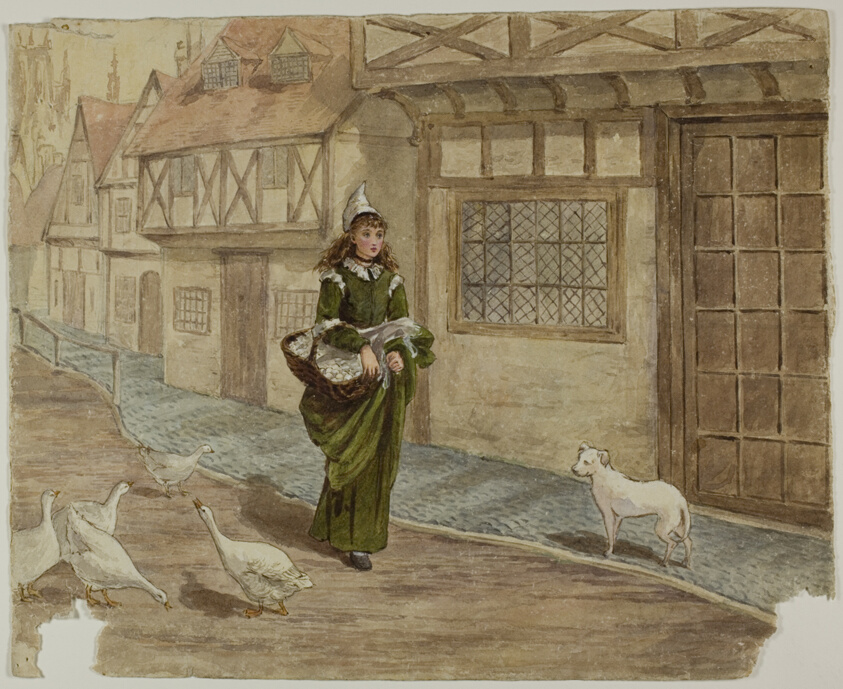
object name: Drawing and Watercolor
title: Girl with Eggs and Geese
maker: Kate Greenaway (English, 1846-1901)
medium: Watercolor, with graphite, on ivory watercolor paper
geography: England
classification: watercolor; drawings (visual works); prints and drawing